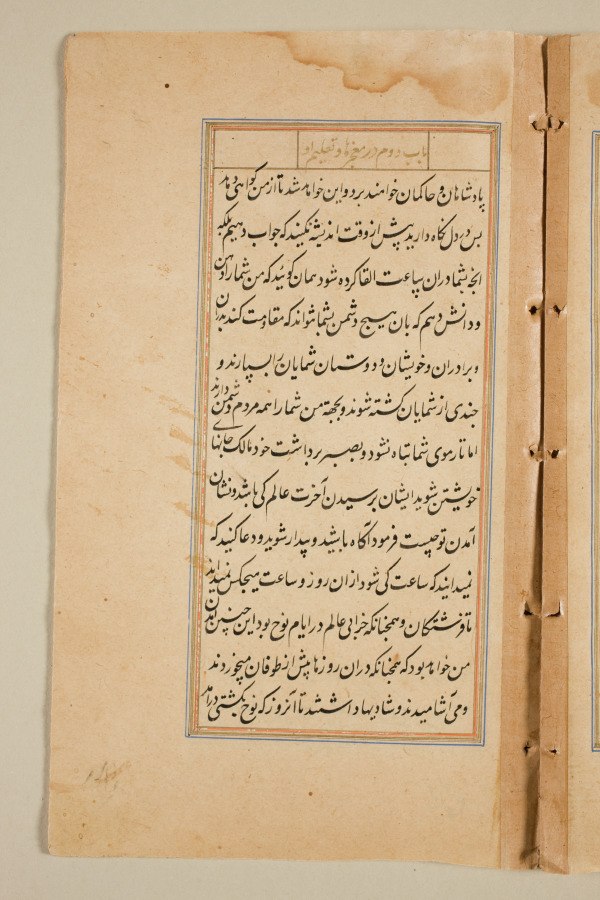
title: Text page from a Mirror of Holiness (Mir’at al-quds) of Father Jerome Xavier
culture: Mughal India, Allahabad, made for Prince Salim (1569–1627)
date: 1602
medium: Ink and gold on paper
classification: Manuscript